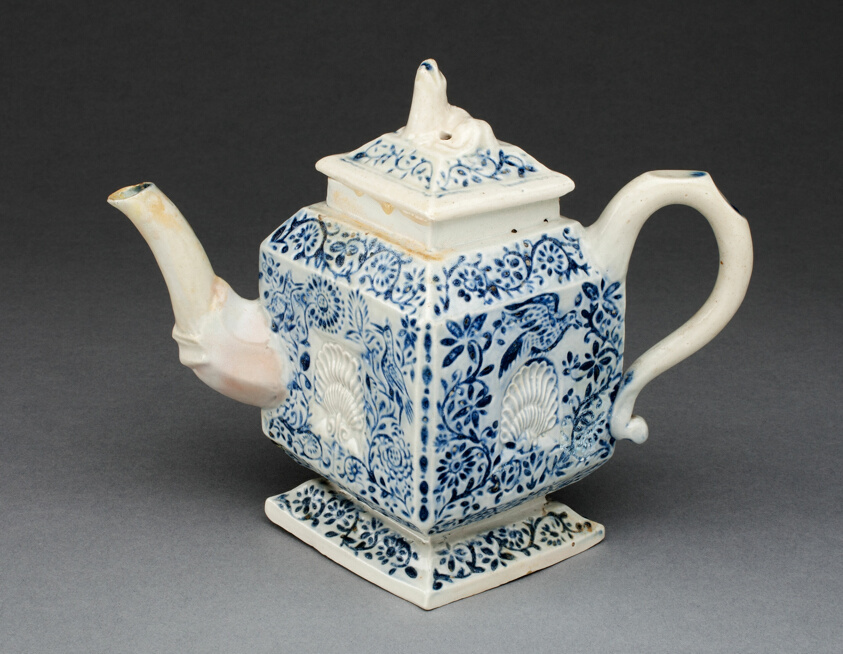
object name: Ceramics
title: Teapot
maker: Staffordshire, England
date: c. 1750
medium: Salt-glazed stoneware, cobalt blue decoration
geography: Staffordshire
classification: teapot; salt-glazed stoneware; european decorative arts; pottery; ceramics